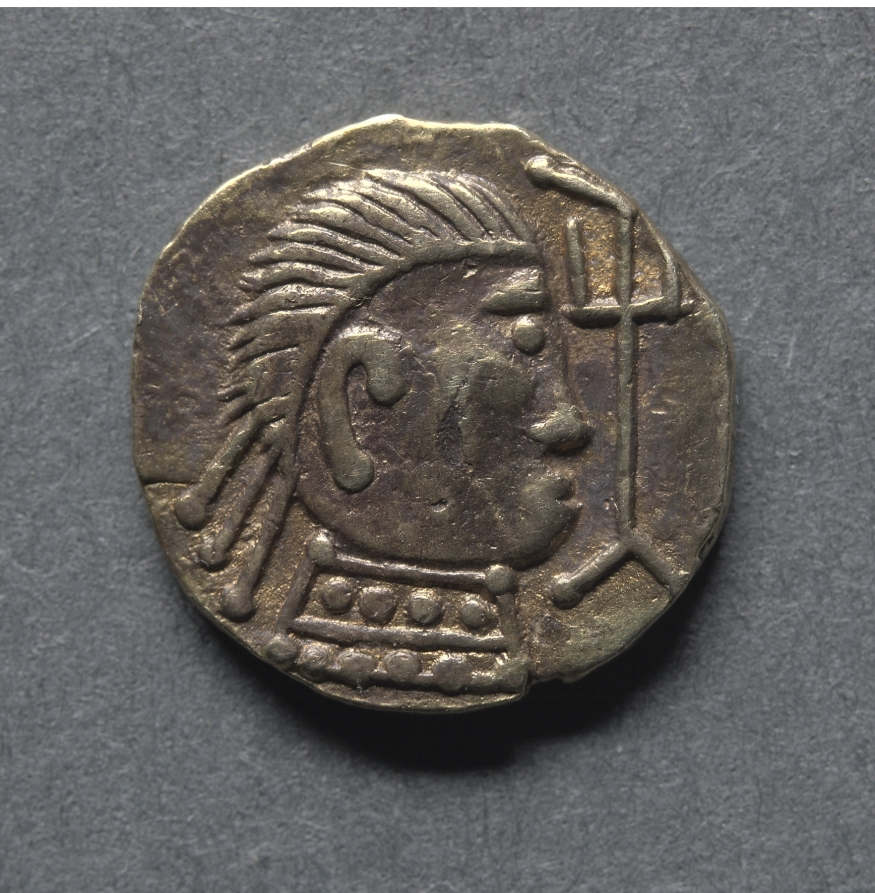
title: Witmen Tremissis: Bust and Trident (obverse)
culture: England, Anglo-Saxon, early 7th century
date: early 600s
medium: gold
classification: Coins